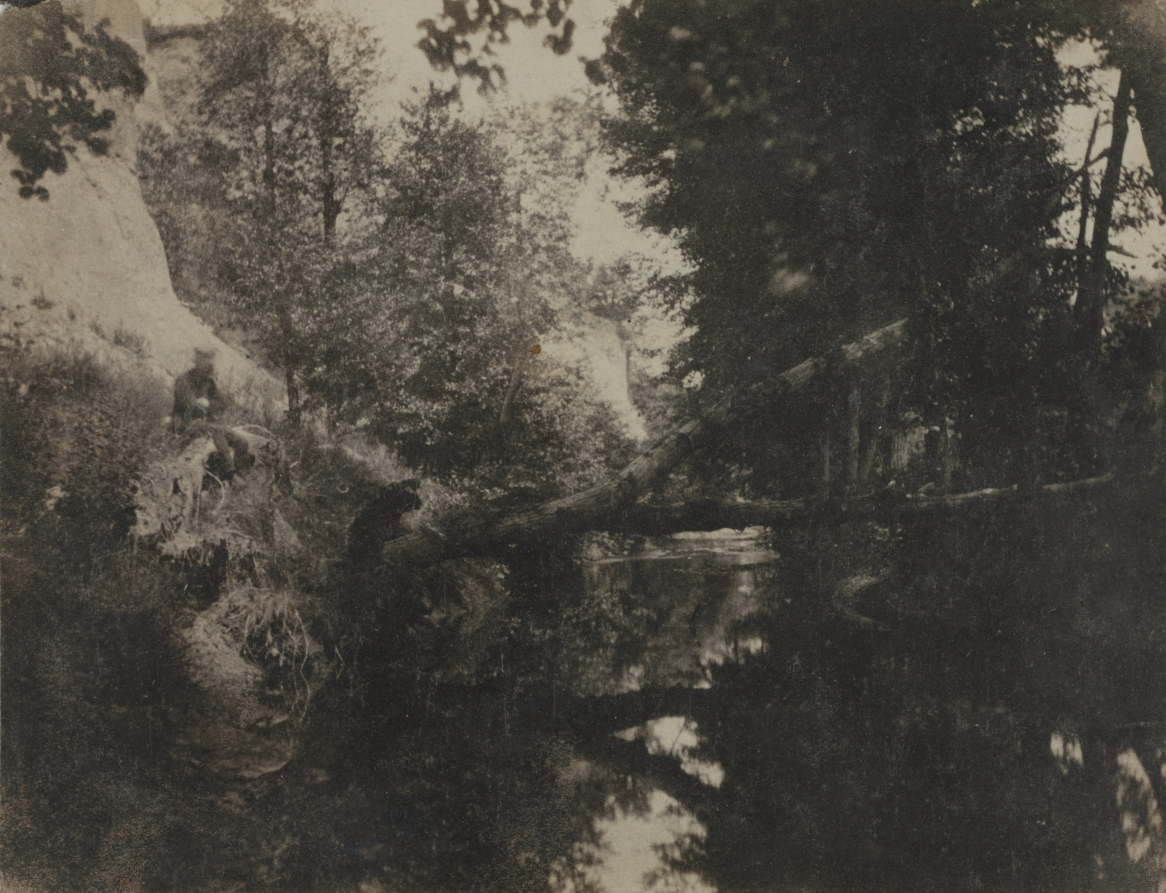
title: Landscape with Seated Figure on Stream Bank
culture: France, 19th century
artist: Frank Chauvassaignes (French)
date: c. 1856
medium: salted paper print from waxed paper negative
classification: Photograph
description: Flooded with bright light and enveloped in deep shadows, this romantic landscape is the remarkable achievement of the early French photographer Chauvassaignes, about whom little biographical information is known. His mastery of composition and technique reveals itself in this picturesque composition of water, stream banks, trees, and foliage, evoking a feeling of great tranquility. Inspired by the compositions of paintings and lithographs, Chauvassaignes exploited the inherent characteristics of the paper negative, enabling him to subordinate details while emphasizing the effects of light and shadow. The idyllic view, contemplated by a solitary seated gentleman, recedes into deep space through flickering sunlight and leafy boughs. A photographer with a trained and sophisticated eye, Chauvassaignes conveyed an uncommon intimacy in this forest landscape, a favorite subject of mid-19th-century artists.